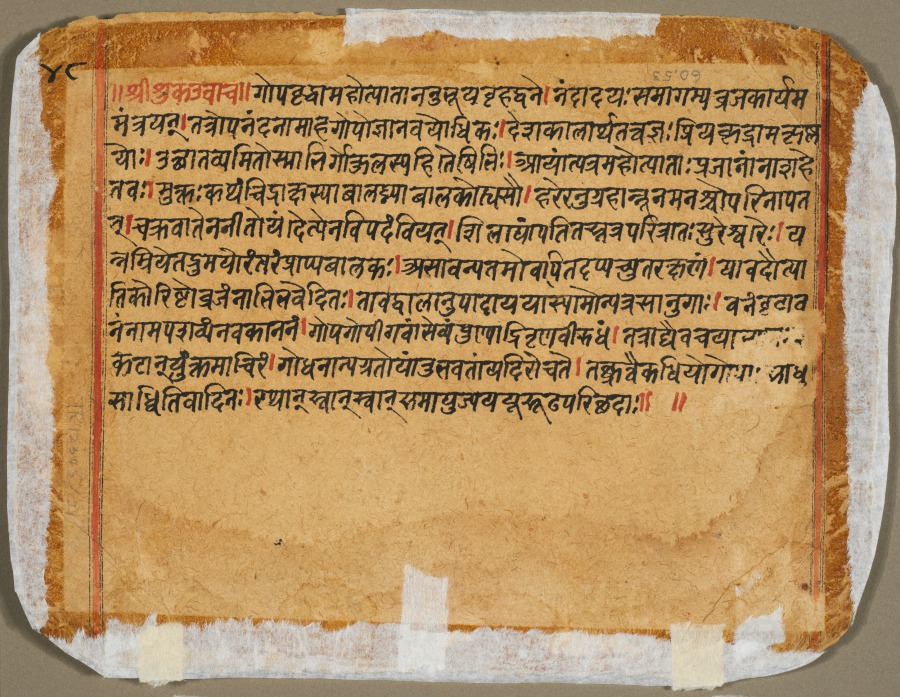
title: Nanda and the elders, page from a Bhagavata Purana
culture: Northern India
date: c. 1525–40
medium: Gum tempera and ink on paper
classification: Painting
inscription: [[recto, upper left corner]] Sa. Mitharama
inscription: [[recto, upper right corner, badly faded]] Hlrabai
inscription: [[verso, upper left corner]] 48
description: In a page from a manuscript about the life of the Hindu god Krishna, Krishna’s foster father, wearing green, confers about moving their community to a new location. Their current village has been beset by demons sent by the evil king to kill Krishna. Typical of South Asian compositions of the early 1500s, figures and other elements are arranged in horizontal rows. Above, in the story of an encounter between a gardener and a merchant’s daughter who wants a rose, we see use of the same Mughal convention, shown with a more natural conceptualization of space. Mughal compositions were often based on earlier illustrations.